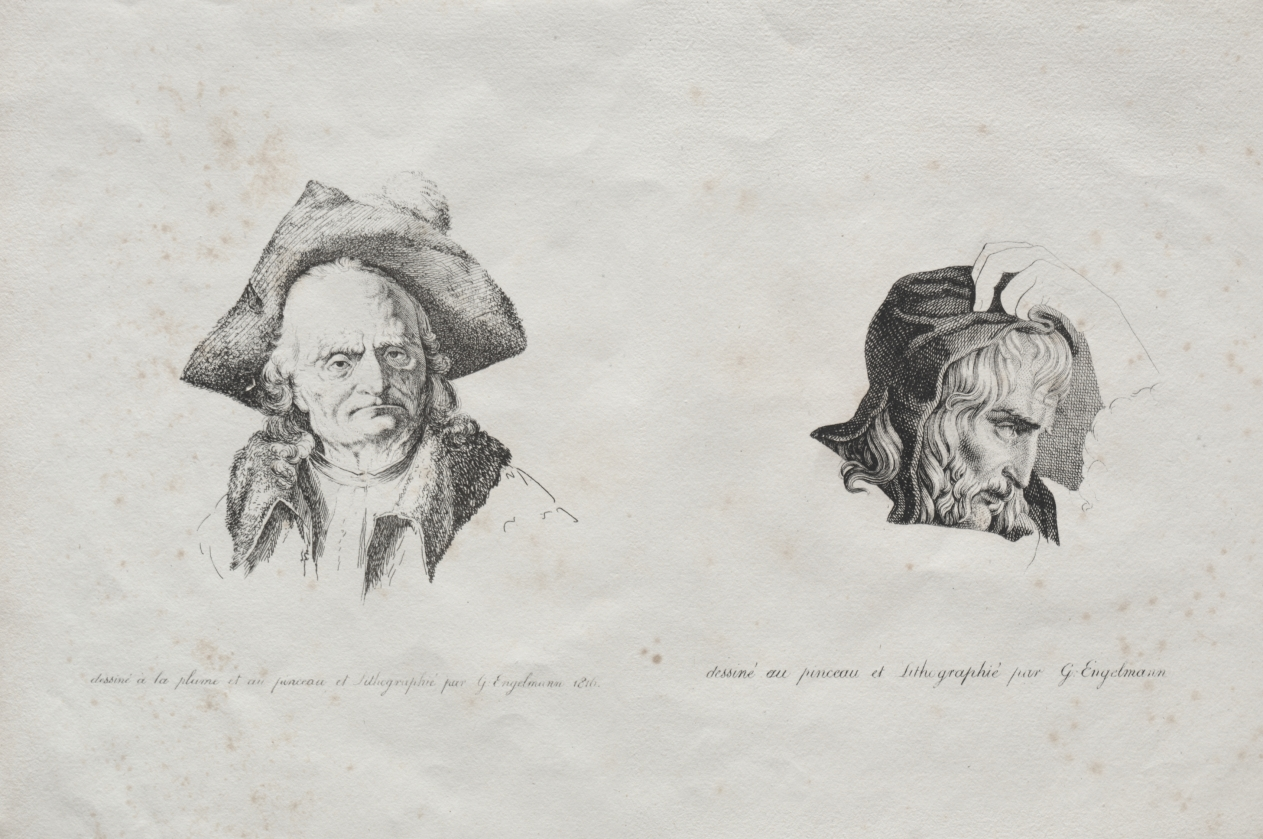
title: Receuil d'essais lithographiques: Deux têtes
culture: France, 19th century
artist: Godefroy Engelmann (French, 1788–1839)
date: 1816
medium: lithograph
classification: Bound Volume